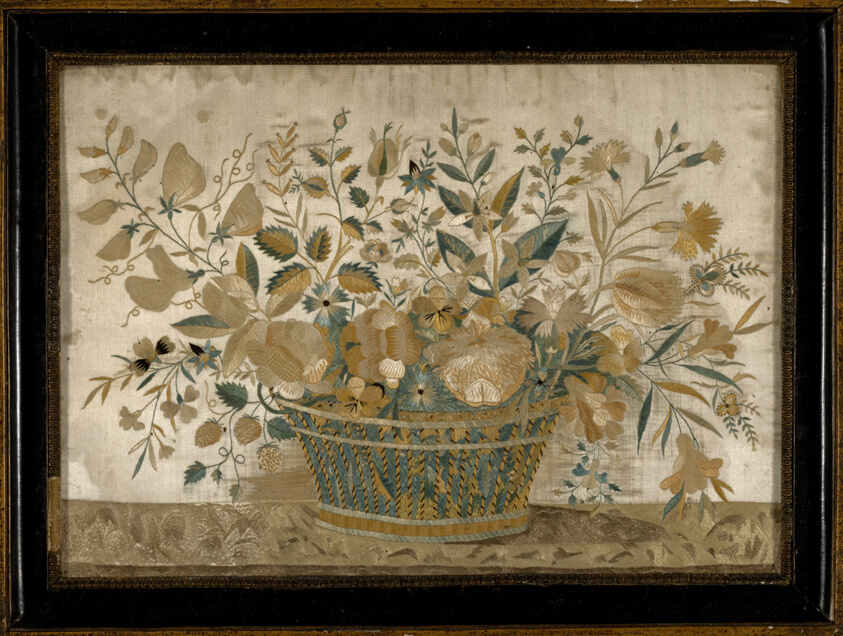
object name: Textile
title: Picture (Needlepoint)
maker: France or England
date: 18th century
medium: Silk, plain weave; embroidered with silk threads in satin and chain stitch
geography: France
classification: textile; needlework (visual works)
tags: floral arrangements